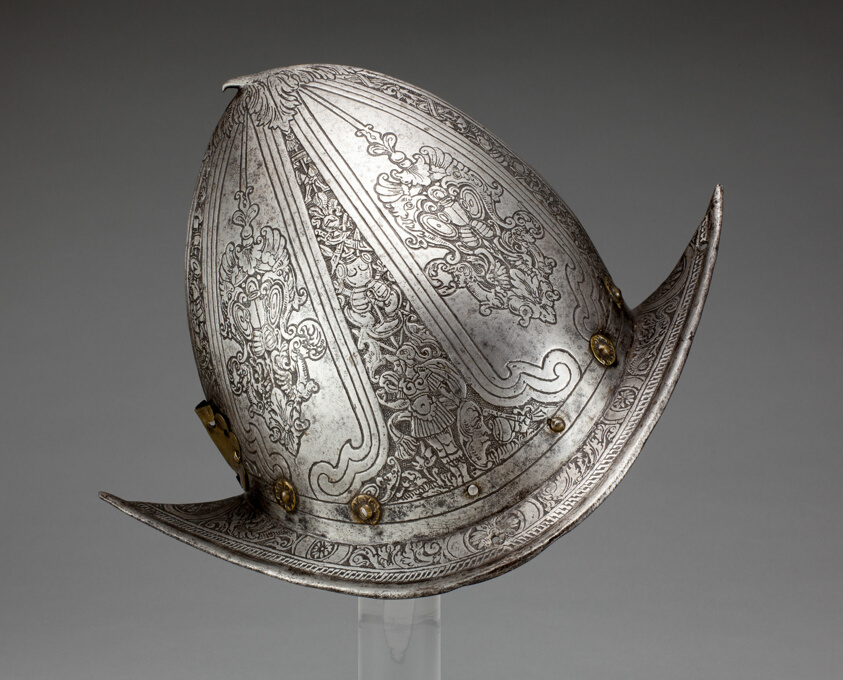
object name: Armor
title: Pointed Morion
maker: North Italian, probably Milan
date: c. 1580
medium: Steel, brass, and leather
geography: Milan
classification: suit-helmet; armor; arms and armor